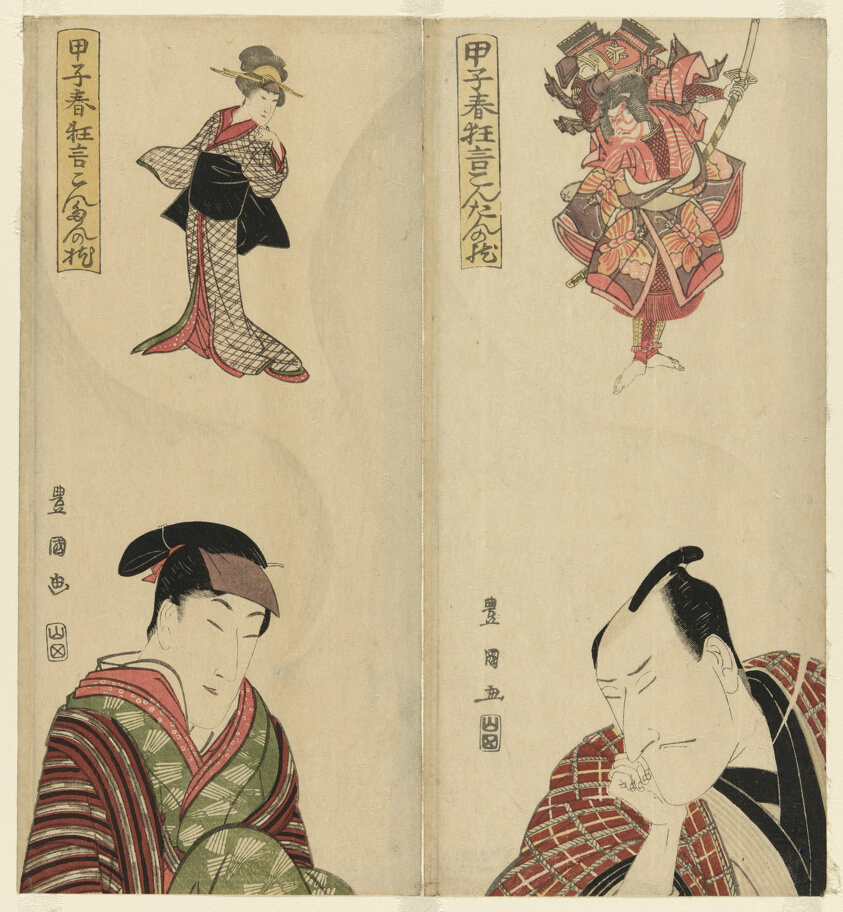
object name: Print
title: Six actors dreaming of their roles, from the series "Spring Plays of 1804: The Pillow of Kontan (Koshi haru kyogen kontan no makura)"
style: Japanese (culture or style)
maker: Utagawa Toyokuni I 初代 歌川 豊国; Japanese, 1769–1825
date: 1804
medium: Color woodblock print; hosoban hexaptych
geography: Japan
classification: woodblock print; print; asian art